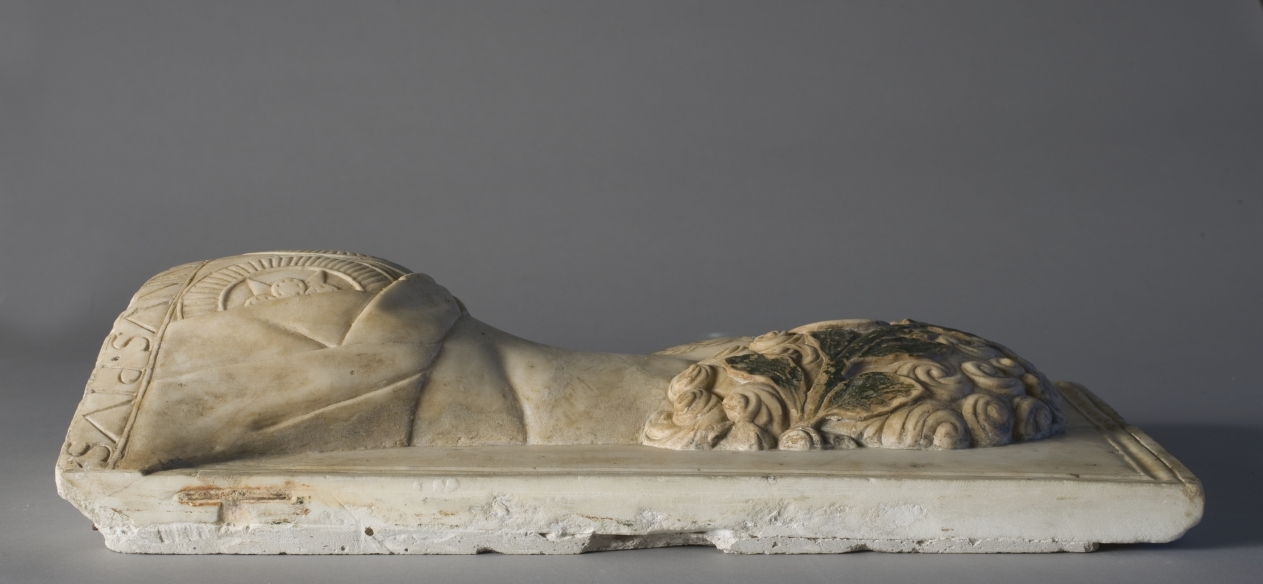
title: Aurelius Antoninus Pius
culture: Italy, Lombard School, late 15th century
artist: Gregorio di Lorenzo (Italian, c. 1436–1504)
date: late 1400s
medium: marble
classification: Sculpture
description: A laurel wreath rests on this Roman emperor’s finely articulated corkscrew curls, underscoring his military triumphs. While many ancient and classically inspired marble sculptures were painted, the survival of pigments is rare. In addition to the vibrant green coloring, traces of gold also remain on the leaves.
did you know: The artist can be identified by his distinctive flame-shaped curls forming the beard.